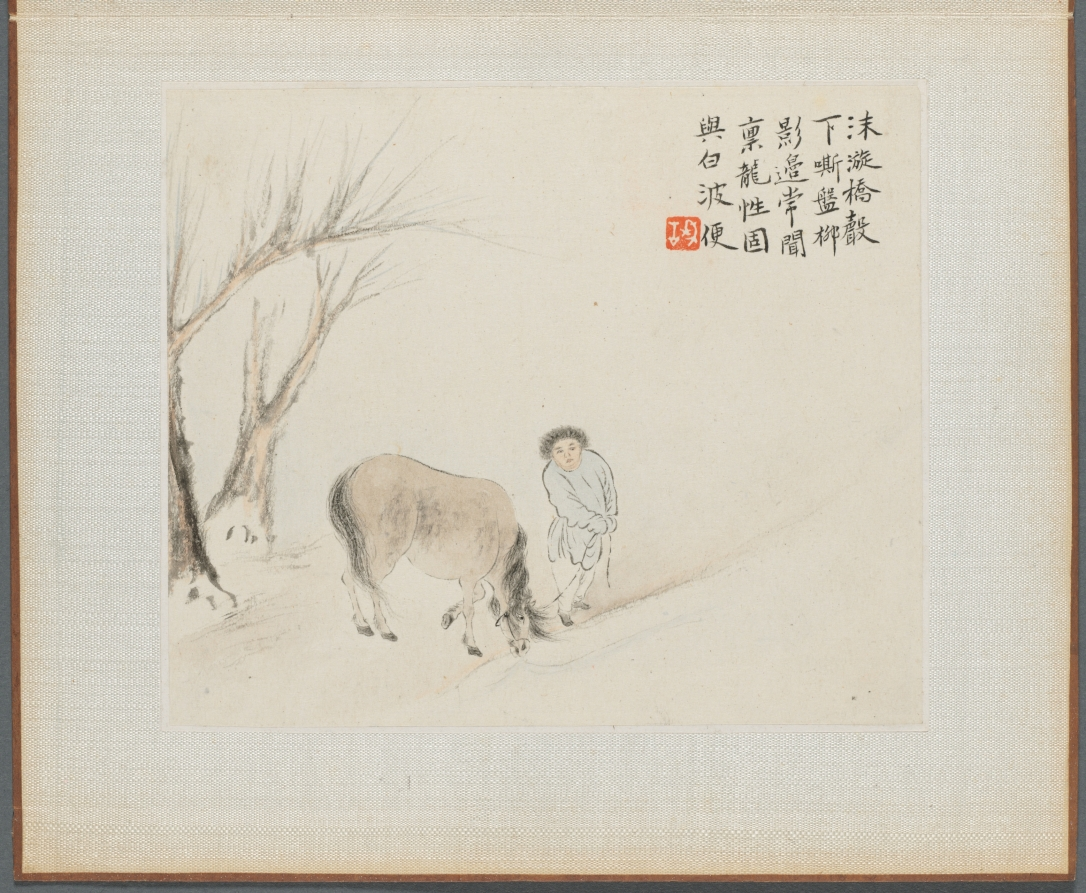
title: Album of Landscape Paintings Illustrating Old Poems: Boy Holding a Horse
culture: China, Qing dynasty (1644-1911)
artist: Hua Yan (Chinese, 1682–c. 1765)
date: 1745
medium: Album leaf; ink and light color on paper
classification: Painting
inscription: Calligraphy and seal upper right corner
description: Hua Yan is one of the Eight Eccentrics of Yangzhou, who rejected orthodox ideas about painting.